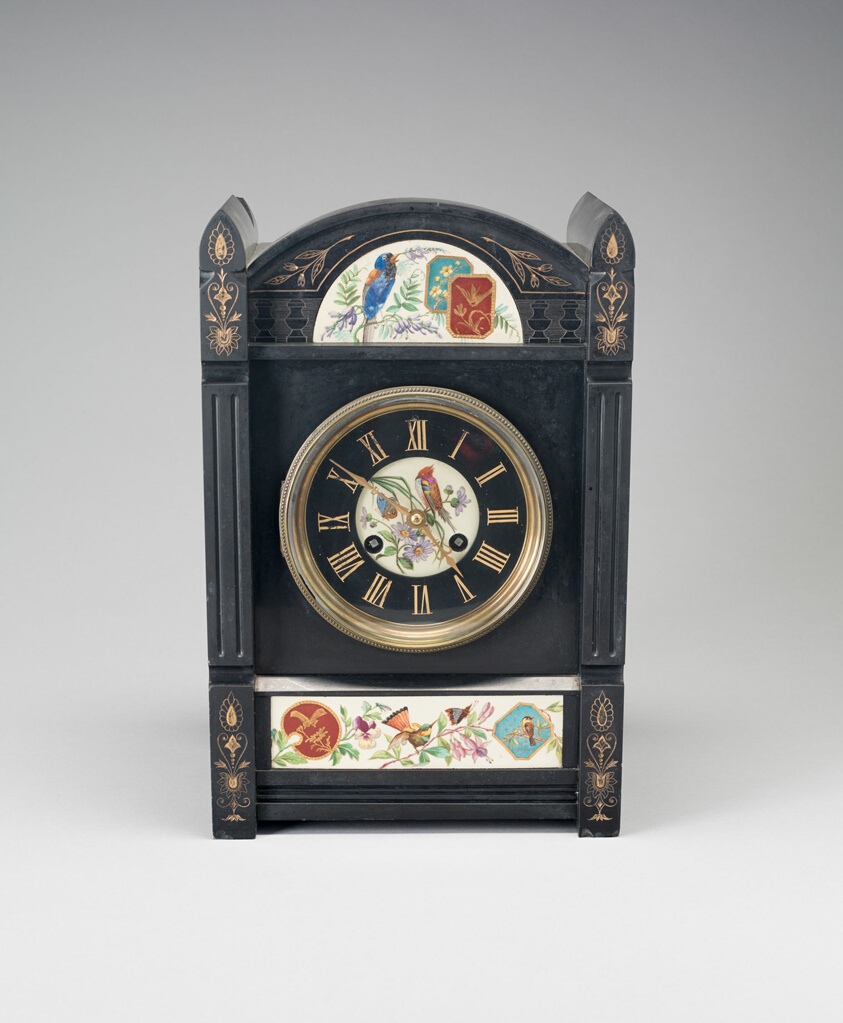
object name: Metalwork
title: Mantel Clock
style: Aesthetic Movement, european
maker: England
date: 1875/80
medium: Slate, enamel, and gilding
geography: England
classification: clock; furniture; european decorative arts; metalwork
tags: furniture